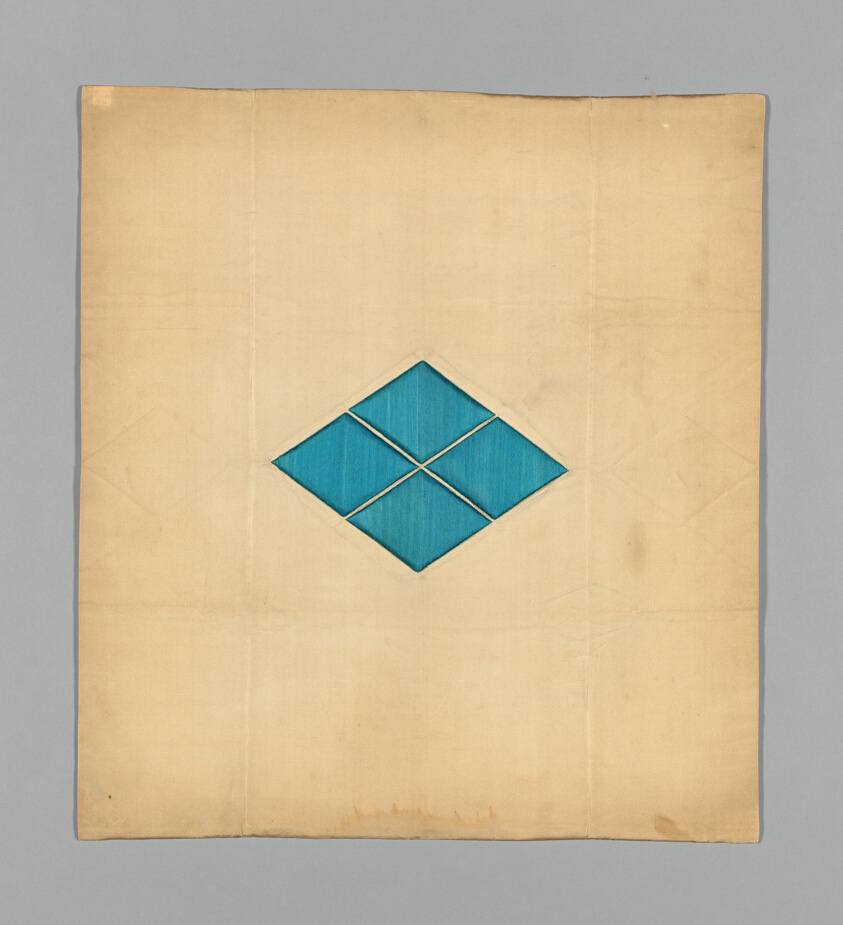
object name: Textile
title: Fukusa (Gift Cover)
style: meiji, Japanism, East Asian, asian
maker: Japan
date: early Meiji period (1868–1912), 1868/83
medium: Mon side: silk, warp-faced, weft-ribbed plain weave (shioze); appliquéd with paper covered wood forms; embroidered with silk, laid threads couched along form edges; lined with silk, plain weave (heiken); sewn with front and lining matched in size (Tachikiri awase)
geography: Japan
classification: textile; needlework (visual works); weaving